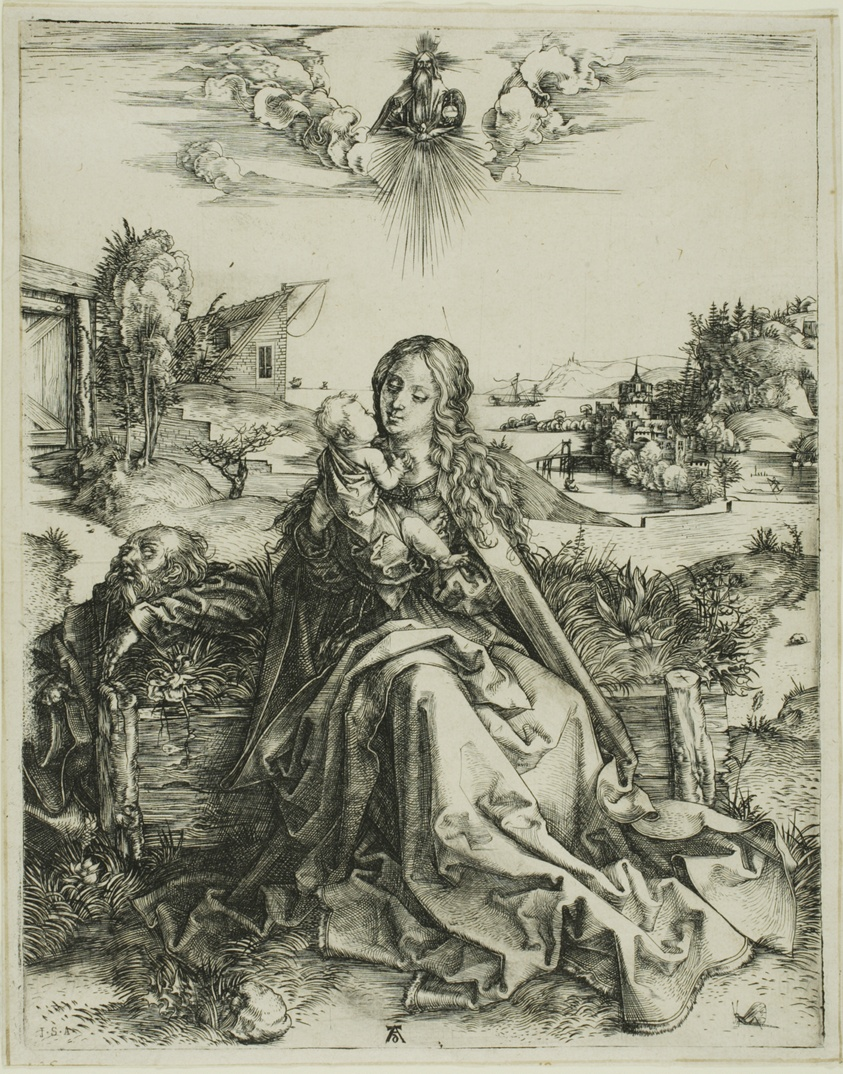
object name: Print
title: The Virgin with the Dragonfly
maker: Albrecht Dürer (German, 1471-1528)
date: c. 1495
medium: Engraving in black on ivory laid paper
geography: Germany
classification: engraving; print; prints and drawing; paper